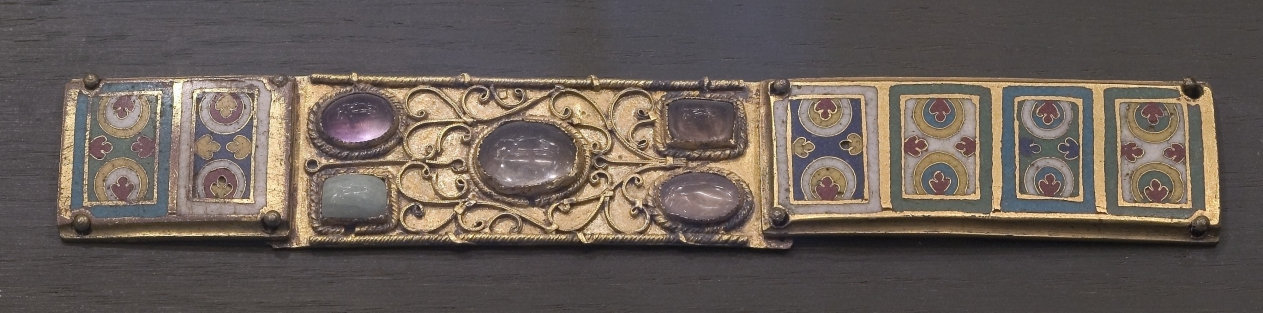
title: Plaque from a Reliquary Shrine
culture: Germany, Rhine Valley, Cologne, Romanesque period, 12th century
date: c. 1170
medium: gilded copper; champlevé and cloisonné enamel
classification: Enamel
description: These decorative enamel plaques (1953.274, 1953.638, 1957.502, and 1961.27) have been linked to some of Cologne's most important reliquary shrines, namely the shrine of the Three Kings at Cologne Cathedral and the shrines of Saints Maurinus and Albinus in the Benedictine abbey church of Saint Panteleon.